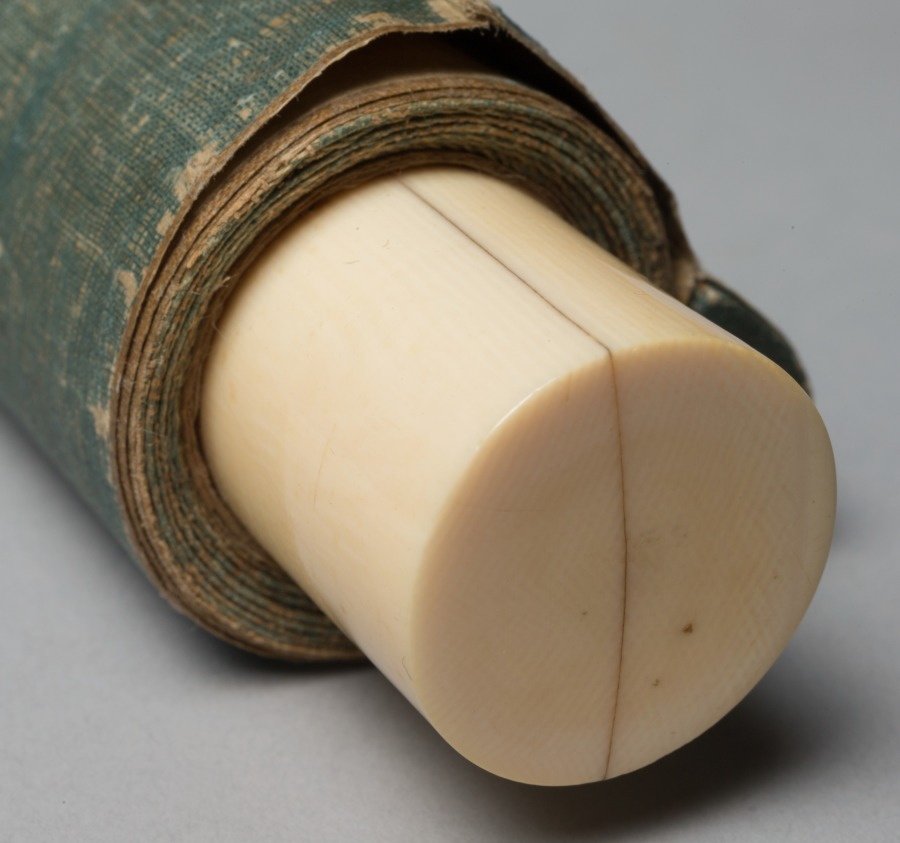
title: Wagtails and Narcissus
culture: Japan, Muromachi period (1392–1573)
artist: Eison (Japanese)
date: mid-1500s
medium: hanging scroll; ink on paper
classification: Painting